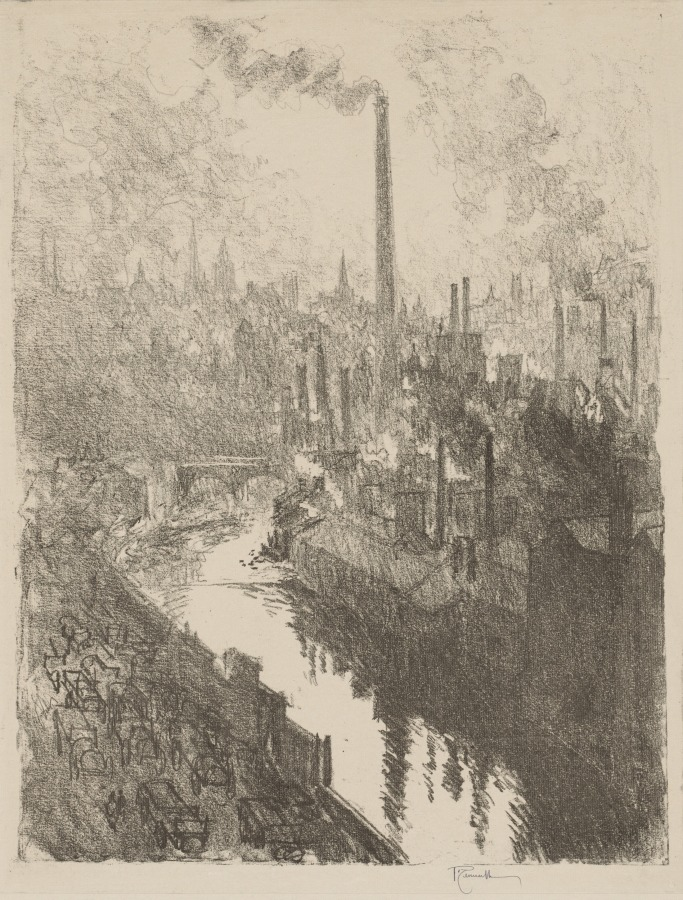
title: English War Work: The Great Chimney, The Motor Park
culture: America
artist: Joseph Pennell (American, 1857–1926)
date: 1916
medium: lithograph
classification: Print